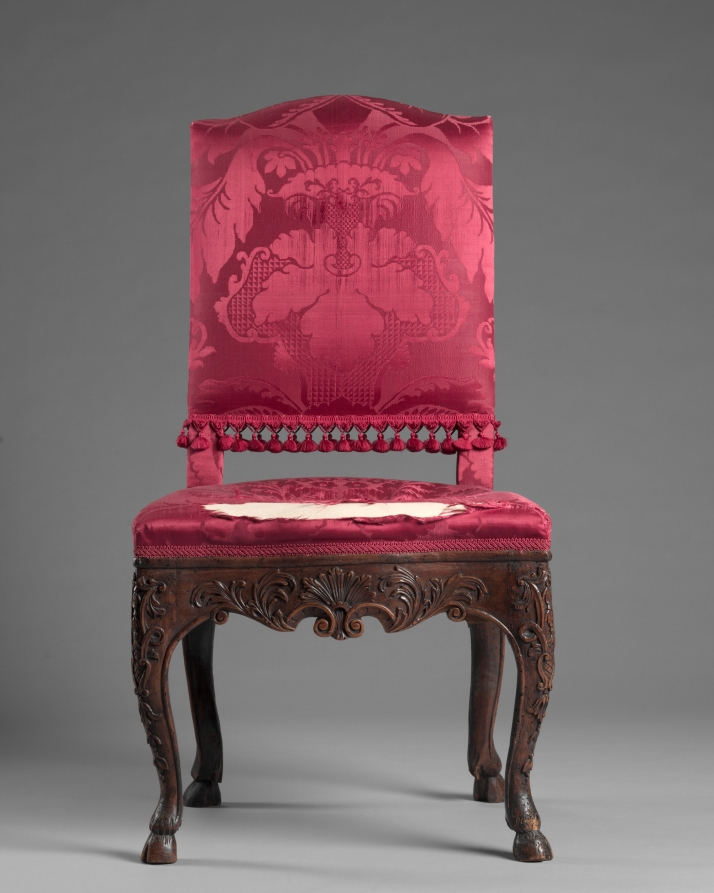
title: Side Chair (2 of 2)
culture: Germany, Belgium, or the Netherlands, early 18th century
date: early 1700s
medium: walnut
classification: Furniture and woodwork